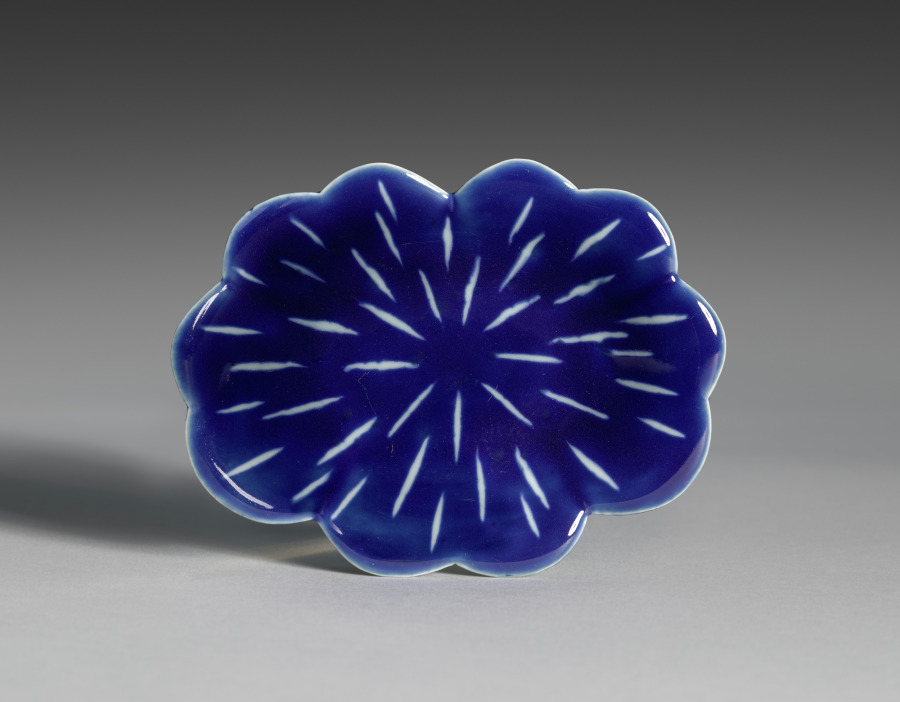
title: Small Dish (Kozara) with Fireworks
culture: Japan, Edo period (1615–1868)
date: mid-1600s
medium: Porcelain with molding and underglaze blue (Hizen ware, Nabeshima type)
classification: Ceramic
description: This dish evokes the popular summer pastime of fireworks displays.